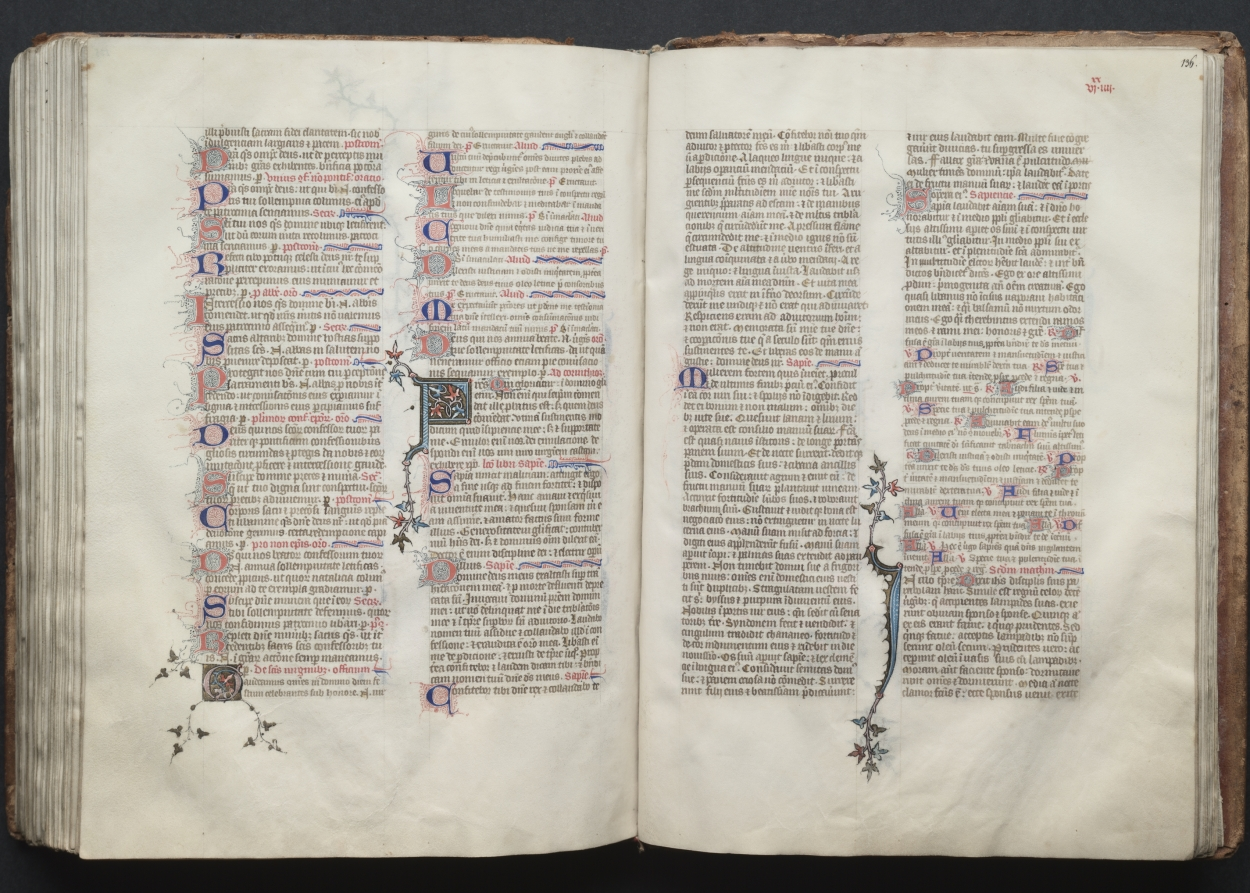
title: The Gotha Missal: Fol. 135v, Text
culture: France, Paris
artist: Master of the Boqueteaux (French)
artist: and Workshop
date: c. 1375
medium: ink, tempera, and gold on vellum; blind-tooled leather binding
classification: Bound Volume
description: The style and quality of this manuscript's decoration is typical of deluxe Parisian books made for aristocratic or royal patrons. Most of the book's decoration appears to be the work of the Master of the Boqueteaux, an artist active at the court of King Charles V (died 1380). His style was apparently shared by a number of book illuminators working in and around Paris. It is very possible that the Gotha Missal belonged to Charles V, but is not provable because the manuscript has no royal portraits and lacks a colophon. Given the book's magnificent decoration, however, it would seem that it was produced for a Valois prince, if not for the king himself. The manuscript receives its name from the German dukes of Gotha, its later owners.